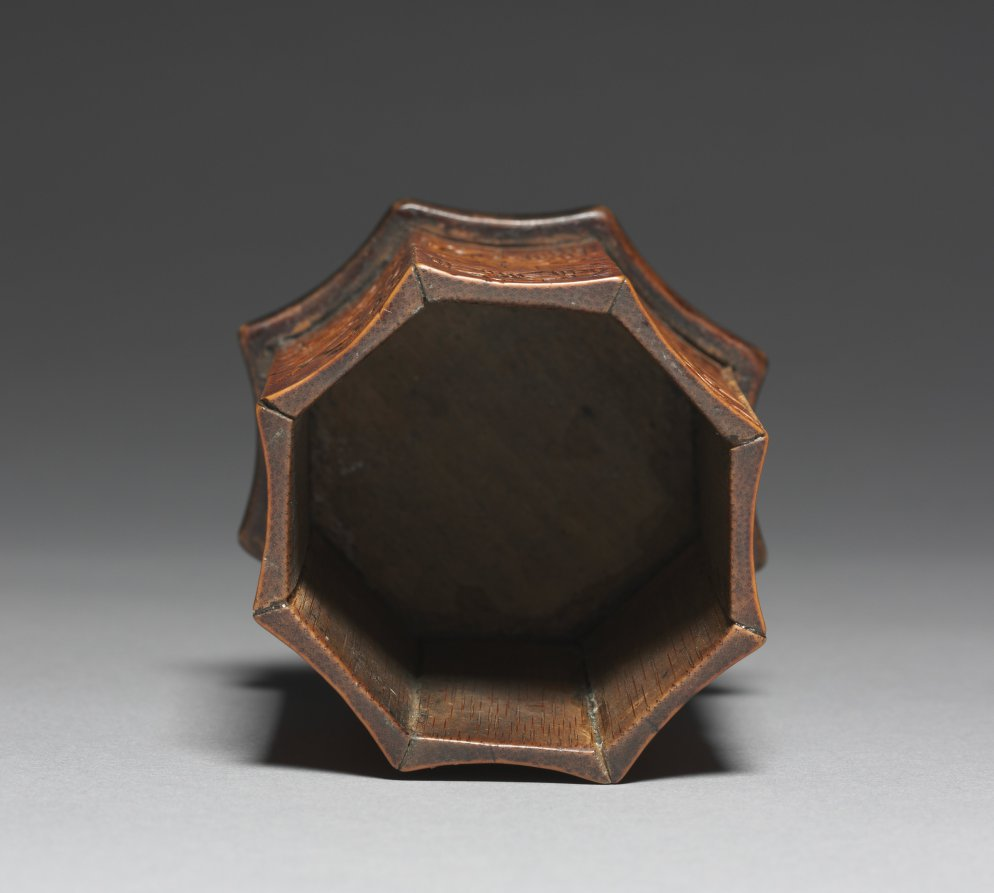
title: Brush Holder with Bamboo and Landscape Design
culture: Korea, Joseon dynasty (1392–1910)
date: 1800s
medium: carved bamboo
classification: Wood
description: An 18th-century Korean collector Yu Man-joo (1755–1788) wrote that “spending money on luxury clothing, dishes, and decorations for the home is a waste, but acquiring fancy writing tools helps to develop elegant taste and high-mindedness.” Inspired by aesthetic discourses on elegance versus vulgarity in late Ming Chinese literature, Korean collectors in the late 1700s and 1800s strove to assemble objects that would display their intellect and sophisticated taste. Stationery objects in particular—printed books, finely crafted brushes, brush holders, ink stones, water droppers, stone wares with grayish-white crackled glazes as well as bronze vessels, and incense burners—were all objects that reflected pure and elegant taste.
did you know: Stationery objects such as this brush holder were highly appreciated among scholars, not only for their function, but for their aesthetic.